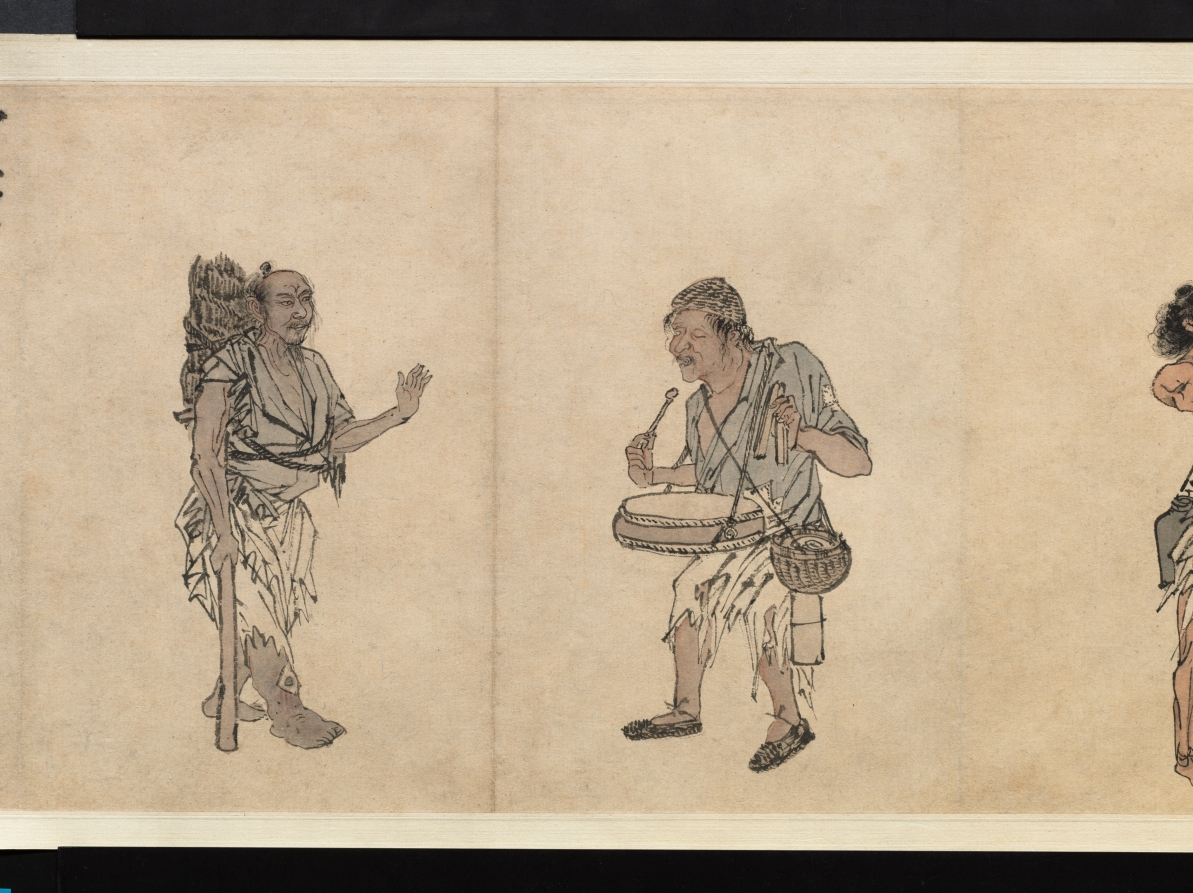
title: Beggars and Street Characters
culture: China, Ming dynasty (1368–1644)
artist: Zhou Chen (Chinese, c. 1450–c. 1536)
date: 1516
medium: Handscroll; ink and light color on paper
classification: Painting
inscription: 題: 周臣流氓圖. 古堇趙鶴琴 [印] 老鶴臨池; 鵝池軒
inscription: 正德丙子秋七月，閒窗無事 ，偶記素見市道丐者種種態度。乘筆硯之便，率爾圖寫。雖無足觀，亦可以助警勵世俗云。 東邨周臣記 [印]東邨; 舜卿; 鵝場散人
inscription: 吳中東邨周君，善丹青，尤長於人物。此圖其所見盛市丐者之狀種種，各盡其態，觀者絕倒。嗟乎，今之晝夜乞哀以求富貴者，安得起周君而貌之耶。臥雲徵君出示，余漫題其後。 甲子歲十月吳門黃姬水 [印] 士雅山人; 另一印不詳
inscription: 是冊凡數種。其飢寒流離疲癃殘疾之狀，種種之異。觀此而不惻然心傷者，非仁人也。計正德丙子逆瑾之流毒已數年。而[江]彬 [錢] 寧輩肆虐方熾。意分符剖竹諸君，亦鮮有能撫字其民者。然則舜卿此作，殆與鄭君 流民圖同意。其有補於治道者不淺，要不可以墨戲忽之也。 長洲張風翼題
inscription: 東村此筆，蓋圖寫飢寒乞丐之態，以警世俗耳。而質山 [黃姬水]欲其寫昏夜乞哀，而靈墟[張鳳翼]則擬之於安上門圖。二君之見，其各有所指哉。昔唐六如每見周筆，輒稱曰：周先生！蓋深服其神妙之不可及。若此冊者，信非他人可能而有符於六如之心伏矣。豈易得耶。若黃、張之指，則又論於畫之外，不在於形似筆墨之旨也。 萬歷丁丑十二月三日 茂苑文嘉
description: Zhou Chen from Suzhou provides rare depictions of impoverished people that once filled the city’s markets and streets. Despite Suzhou’s prosperity, its rapid growth polarized society, including the wealthy and those who had deserted their farmlands, who were without homes, unemployed, or sick. Amid these are figures who inspire fear rather than empathy. The painting may thus be informed by local practices at the end of the lunar year, in which street beggars, in exchange for food or money, would dress up like ghosts and demons to drive out evil forces.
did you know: Although Zhou Chen's original composition was an album of 24 figures, today it is mounted as two handscrolls, one in the Cleveland collection and one in the Honolulu Museum of Art.